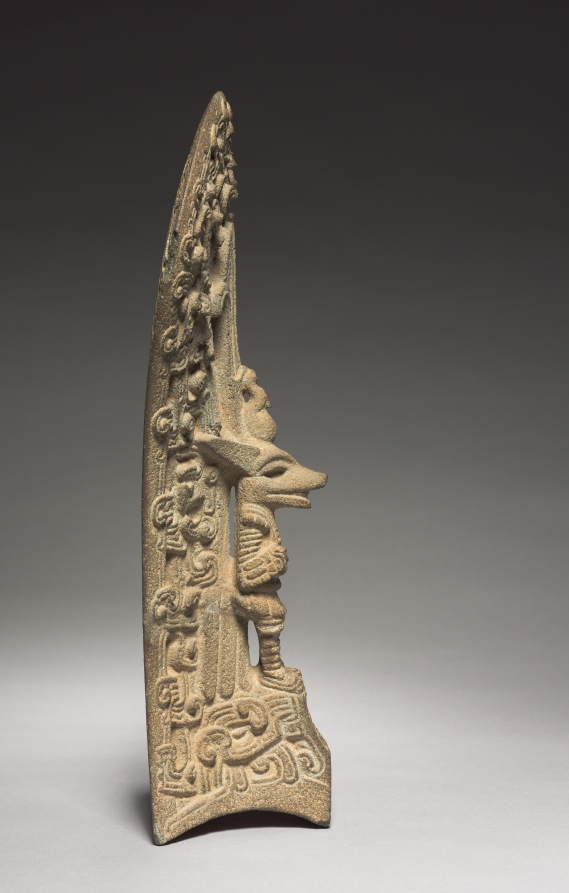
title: Ballgame Palma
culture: Mexico, Gulf Coast, Classic Veracruz style (600-1100)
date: c. 900–1100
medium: stone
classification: Sculpture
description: Stone palmas—so-called today for their palm frond-like shape—are ceremonial sculptures that may replicate lightweight gear worn over the chest during the ballgame. The scene on the back of this palma vividly illustrates the tie between the ballgame and sacrifice. A bat descends from the top, clutching severed human body parts, and at the center an upright figure brandishes a blade over a reclining victim. The scene's many animal figures, including the one on the front, may belong to ballgame mythology that now is lost.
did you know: The Mesoamerican ballgame was played with a hard rubber ball that players bounced off their hips.